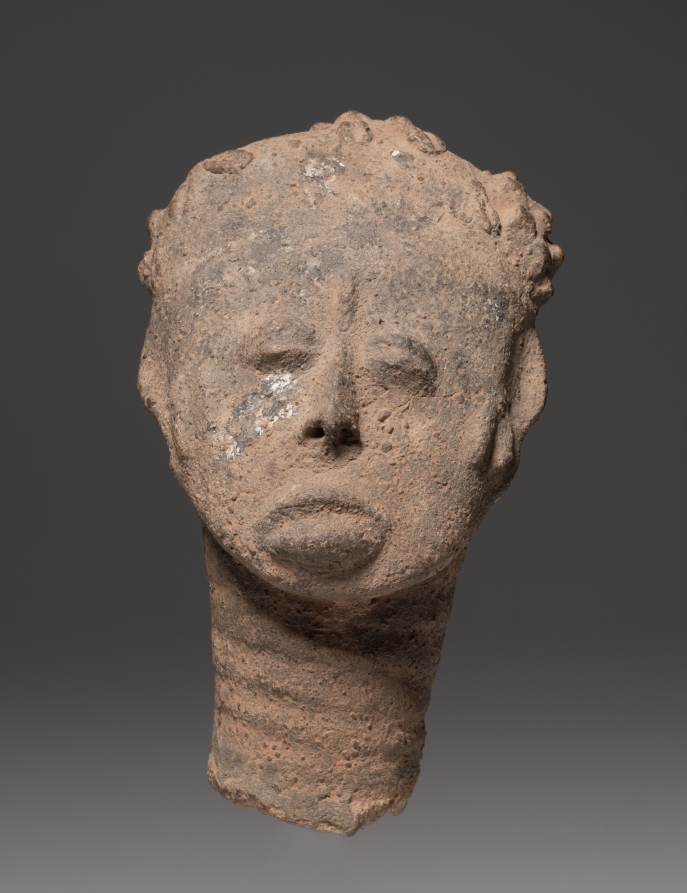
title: Figure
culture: Africa, West Africa, Ghana, Akan-style artist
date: 1800s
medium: Terracotta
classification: Sculpture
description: A master female potter among the Asante created this clay sculpture to commemorate the departed. While not a naturalistic portrait, this figure depicts features associated with the dead person such as coiffure or facial marks. The rolls of flesh on the neck are a widespread artistic convention for beauty, prosperity, and well-being. After placing the memorial in a sacred forest clearing, family members invoked the spirit of the departed and asked it to accept the sculpture and facilitate communications with ancestors.